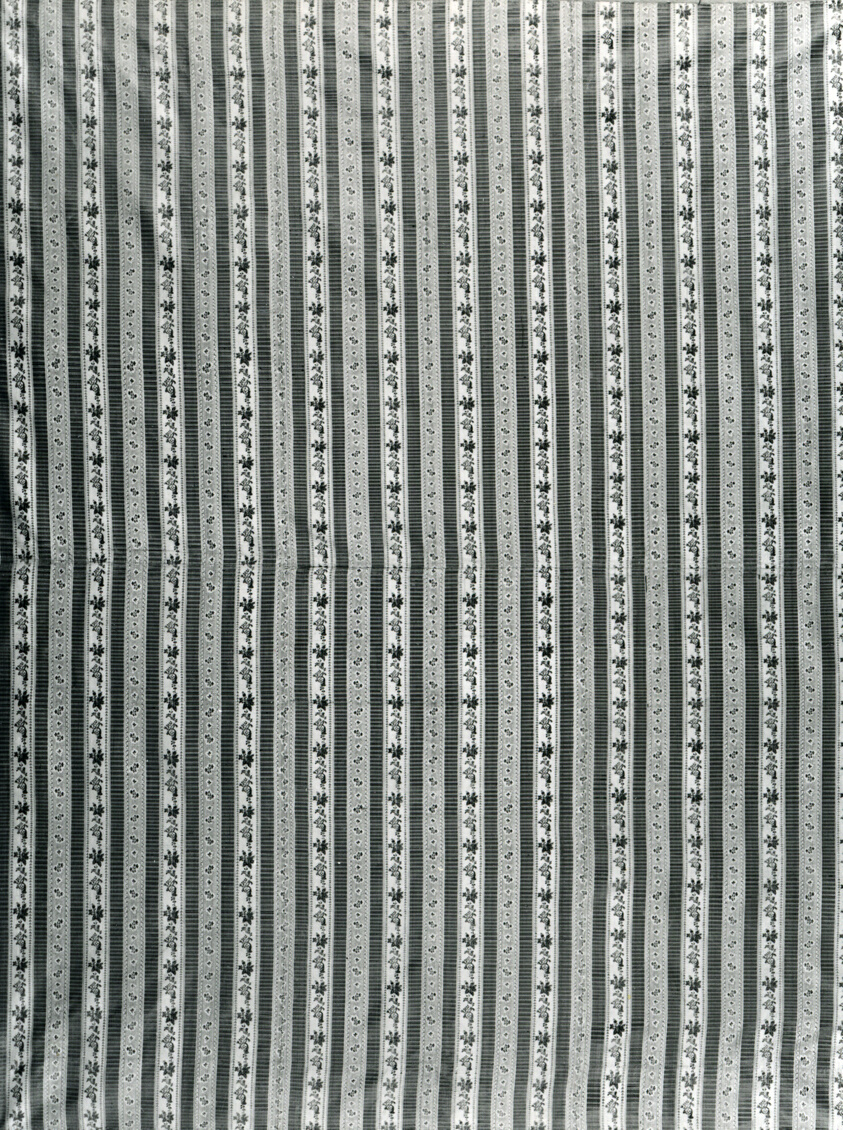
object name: Textile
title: Panel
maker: France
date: Late 18th century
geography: France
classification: textile; weaving